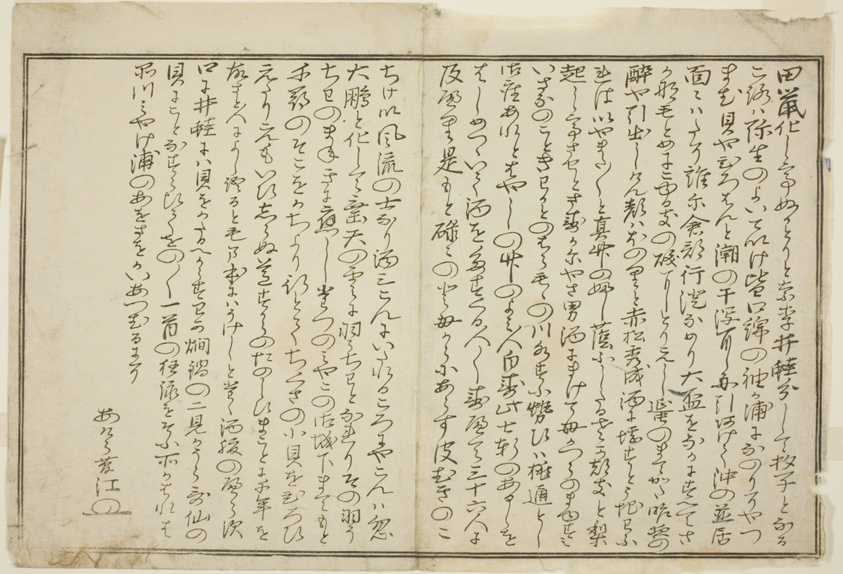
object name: Print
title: Preface, from the illustrated book "Gifts from the Ebb Tide (Shiohi no tsuto)"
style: Japanese (culture or style)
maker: Kitagawa Utamaro 喜多川 歌麿; Japanese, 1753 (?)-1806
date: 1789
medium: Woodblock print; double-page preface from book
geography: Japan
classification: woodblock print; print; asian art; woodblock